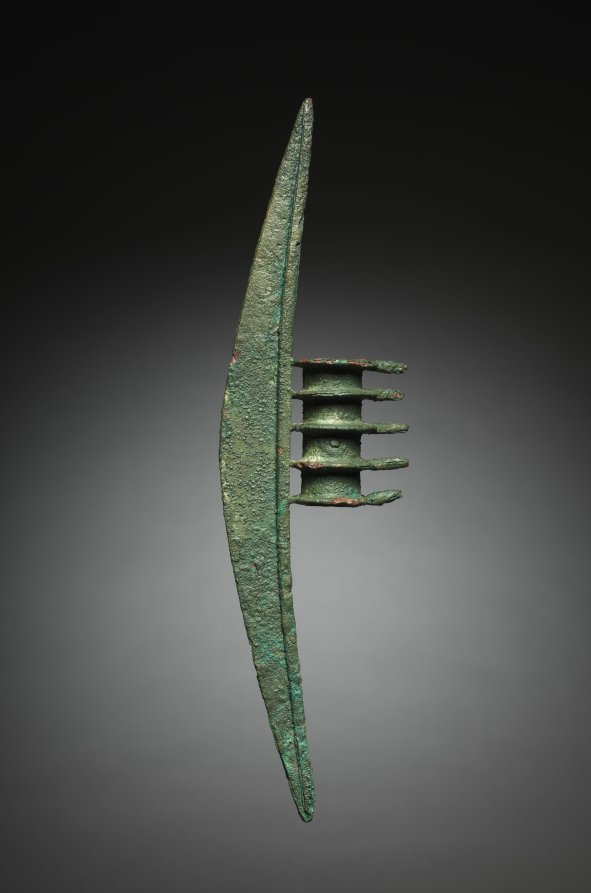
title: Crescent Axe Head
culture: Iran, Amlash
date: c. 1000 BCE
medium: bronze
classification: Arms and Armor